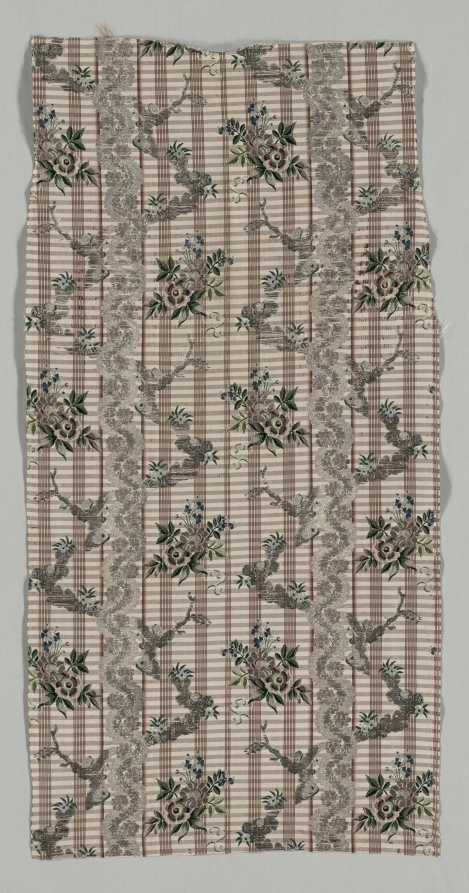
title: Length of Brocaded Silk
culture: France, 18th century, Period of Louis XVI (1774-1793)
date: 1774–1793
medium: brocade; silk and metal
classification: Textile